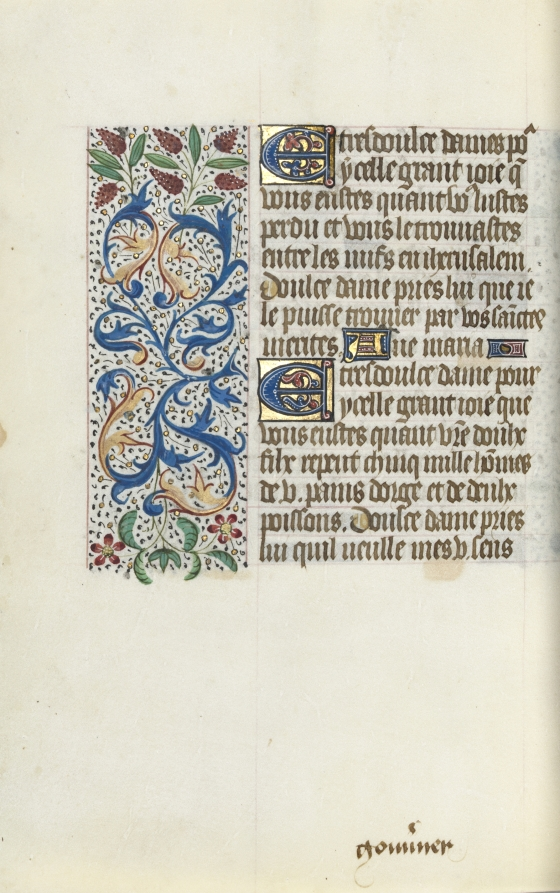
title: Book of Hours (Use of Rouen): fol. 149v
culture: France, Rouen, 15th century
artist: Master of the Geneva Latini (French, active Rouen, 1460–80)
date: c. 1470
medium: ink, tempera, and gold on vellum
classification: Bound Volume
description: In the late 1400s and early 1500s Rouen was an established and important center of book production. The city’s cathedral had a wealthy chapter that spent large sums of money to commission books and to maintain its extensive library. The stationers and booksellers would have likely been concentrated in or near the cathedral precinct. This artist, named after a manuscript now in Geneva, was Rouen’s principal illuminator during the second half of the 1400s.